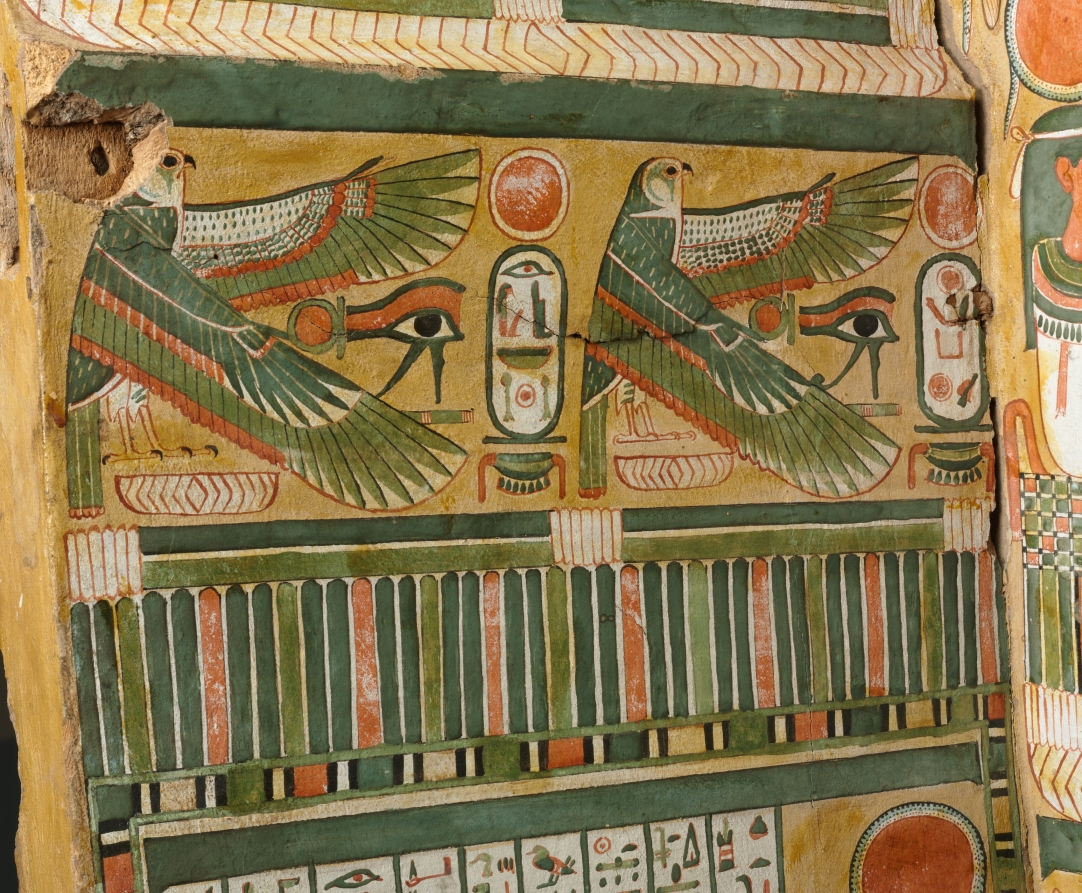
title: Coffin of Bakenmut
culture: Egypt, Thebes, Third Intermediate (1069–715 BCE), Dynasties 21–22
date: c. 1000–900 BCE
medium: gessoed and painted sycamore fig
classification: Funerary Equipment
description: The coffin of Bakenmut is one of the finest examples of painted wooden coffins made for the priests of Amen and their families at Thebes during Dynasty 21 and early Dynasty 22. The pharaohs of this time were no longer buried in the Valley of the Kings, but instead built tombs in the Delta, far to the north, where they resided. Security was lax in the Theban necropolis. The coffins and funerary goods of the wealthy citizens of Thebes were placed in unmarked and undecorated family tombs cut into the cliffs on the west bank of the Nile. All the care and detail that in more prosperous times were devoted to the decoration of the tomb chapel were now lavished on the elaborately painted coffins. Every available surface is crowded with religious scenes, images of funerary gods and goddesses, protective spells, and magical symbols. The deceased appears mummiform. An elaborate floral collar entirely covers the upper body, exposing only the separately attached hands (now lost). A pair of red "mummy braces" are crossed over the chest, their point of intersection marked by a winged sun disk. The lower body is covered with tiny figures modeled in gesso against a yellow background, which gives the effect of gold inlaid with glass or semiprecious stone. The decoration on the interior features two deified dead kings of Dynasty 18. Although these rulers had lived centuries before, memory of their greatness was still very much alive. The main scene near the top depicts Tuthmosis III, the great military pharaoh, who lived 500 years before Bakenmut. Posed as a mummy, the ruler wears a brilliant feathered garment enfolding him with falcon’s wings. The scene below features back-to-back seated images of Amenhotep I, regarded as the patron of the Theban cemetery and worshiped as a local god there.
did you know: Originally another smaller coffin was placed inside this outer coffin and in that the deceased with a mummy board would have rested.